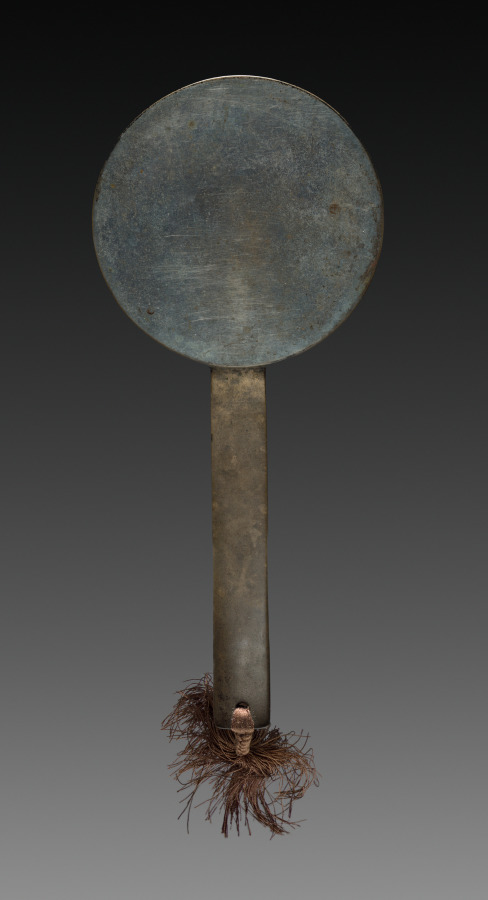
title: Mirror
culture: Japan, Edo period (1615–1868)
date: 1615–1868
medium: bronze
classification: Metalwork